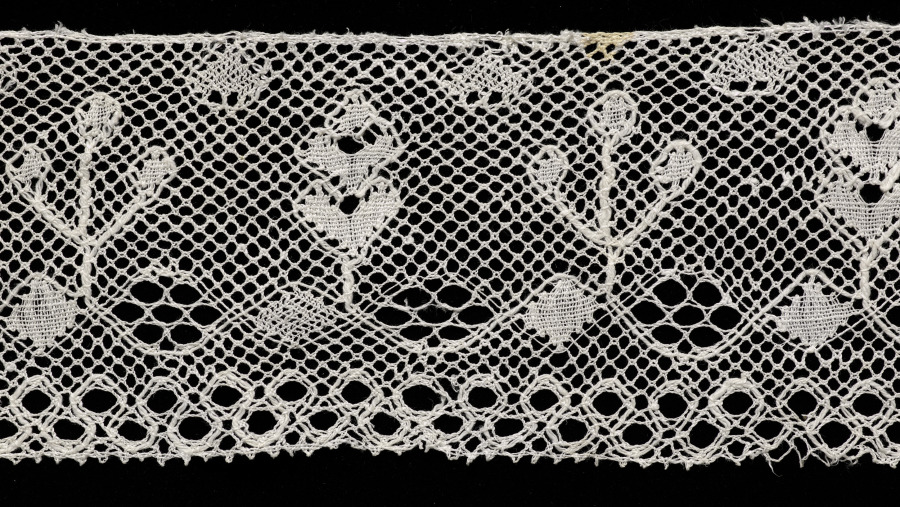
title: Lace Edging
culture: Spain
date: 1800s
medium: Bobbin lace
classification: Lace